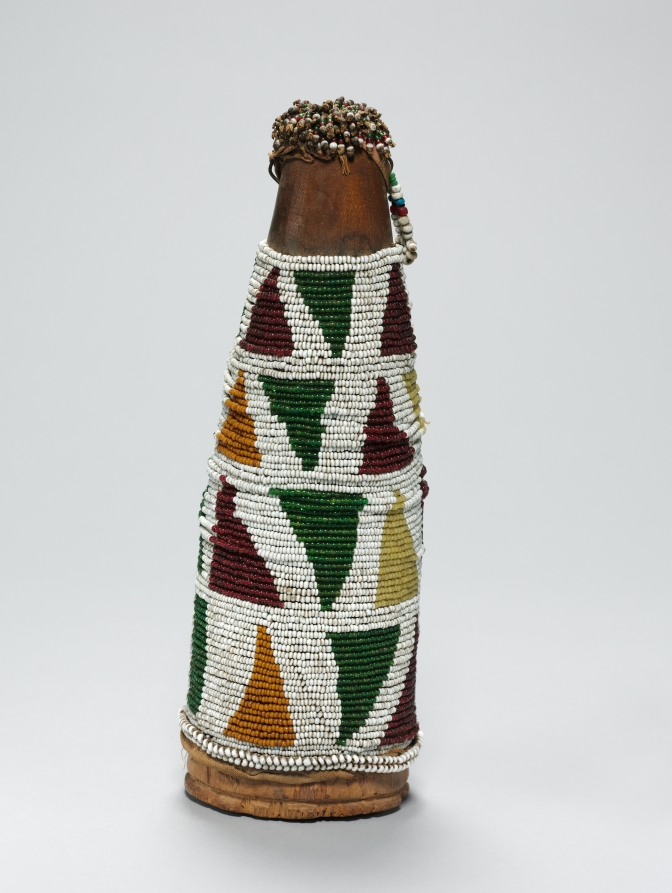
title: Figure (kgöngwana-tshingwana/Ngwana sehô)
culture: Southern Africa, Lesotho, Southern Sotho-style maker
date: 1800s–1900s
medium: Wood, glass beads, cloth, thread, and copper alloy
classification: Sculpture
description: Fertility figures like these were used during the initiation ceremonies of pubescent girls. Integrating talismanic materials in their fabrication, the figures were meant to guarantee fertility and prevent or cure barrenness—a gourd’s womblike shape and the seeds within symbolize fecundity. They are sometimes also called “child figures” because a young bride would care for them as she would for her future children, carrying them on her back and sleeping with them until her first child was born.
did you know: These figures were symbolic infants that recently married women would take care of until their first child was born.